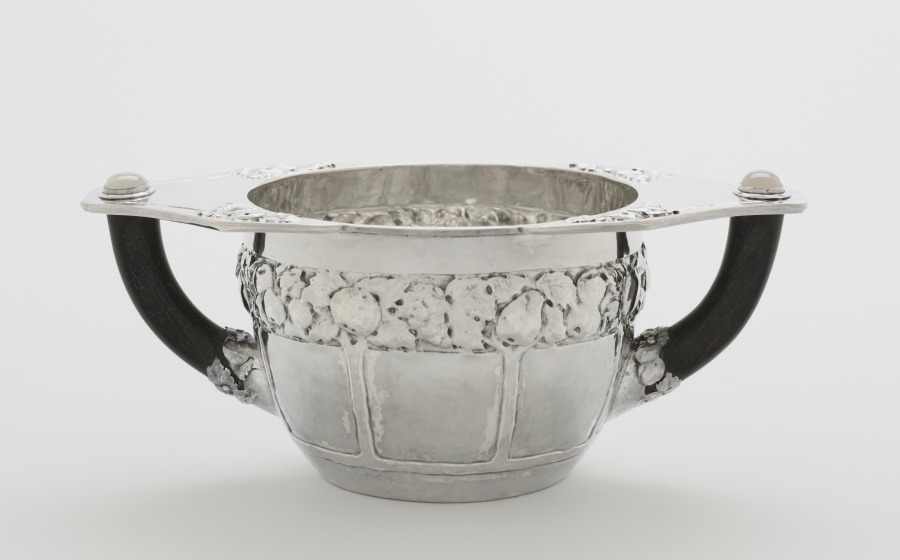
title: Sugar Bowl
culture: America, Ohio, Cleveland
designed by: Louis Rorimer (American, 1872–1939)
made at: and Rokesley Shop (American)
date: c. 1910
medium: silver, moonstones, ebony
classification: Silver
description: This tea and coffee service was designed for production by the Rokesley Shop, a collaborative group working at Louis Rorimer’s studio. Reacting against industrial mass production, Rorimer emphasized inventive design in finely crafted objects.